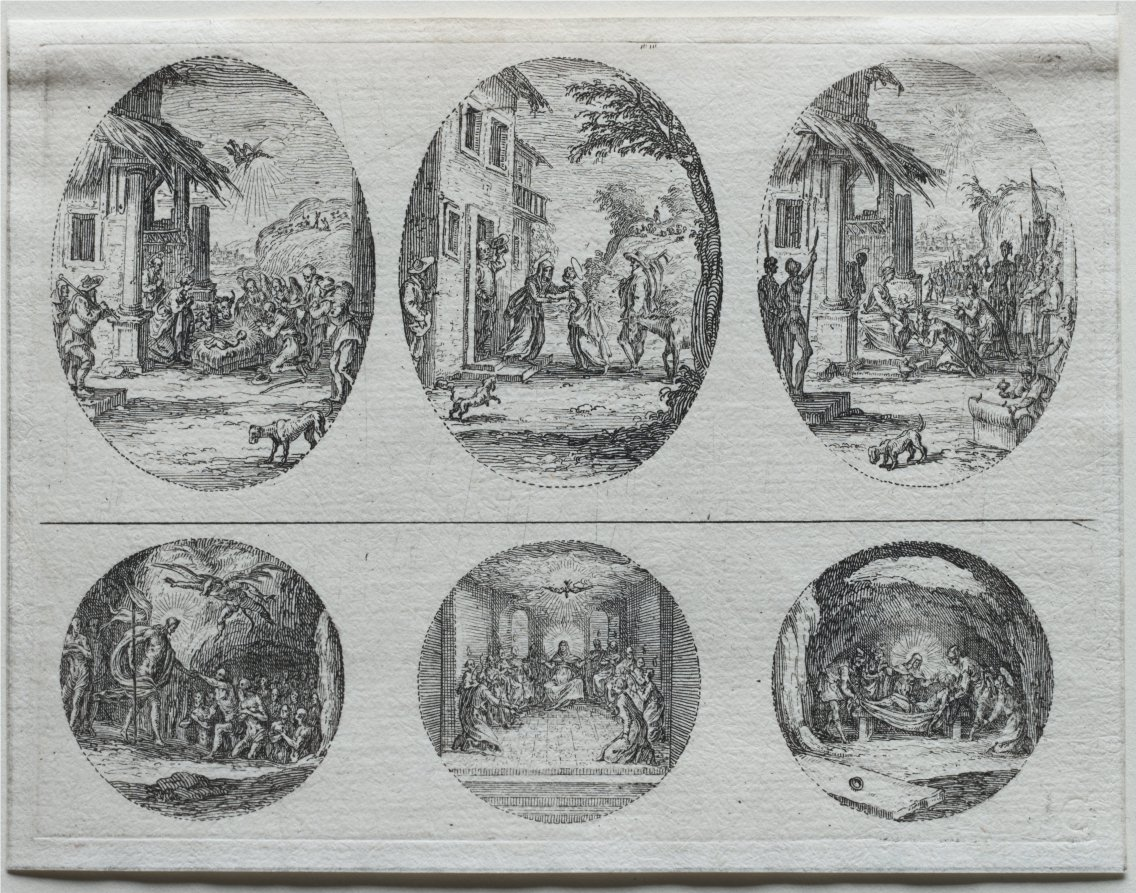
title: The Mysteries of the Passion: The Visitation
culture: France, 17th century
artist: Jacques Callot (French, 1592–1635)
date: 1631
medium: etching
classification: Print